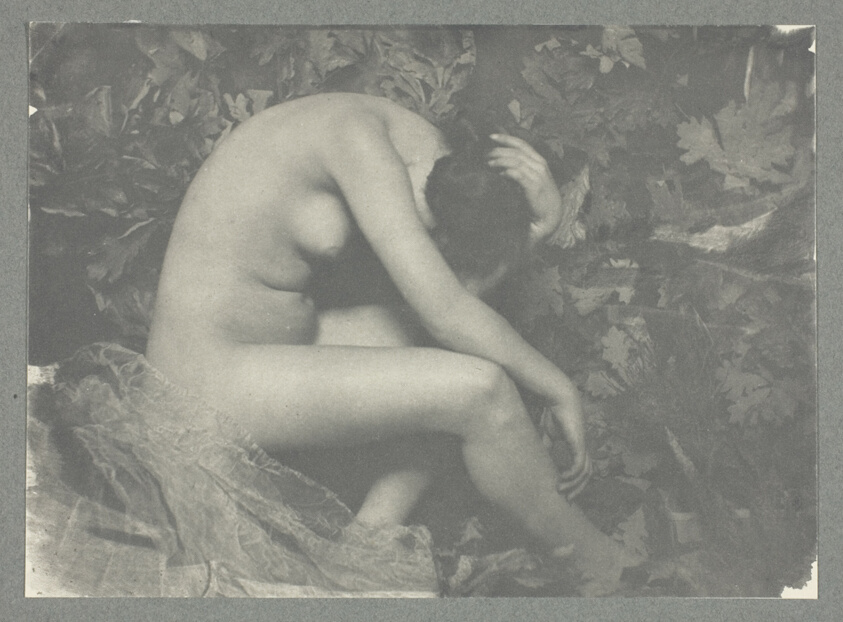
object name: Photograph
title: La Cigale, No. 3 from the portfolio "American Pictorial Photography, Series II” (1901); edition 34/150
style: Pictorialism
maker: Frank Eugene (American, 1865–1936)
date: 1898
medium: Photogravure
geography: United States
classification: photogravure; photomechanical process; photography; photograph